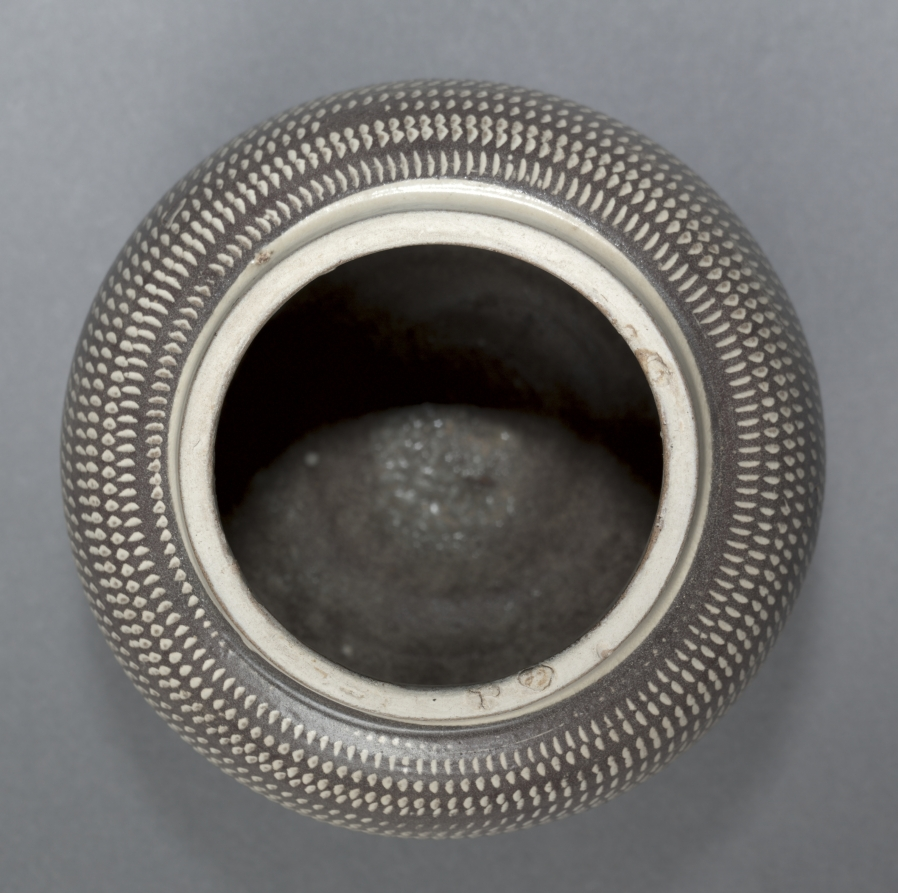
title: Jar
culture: Northern China, Northern Song (960-1127) or Jin dynasty (1115-1234)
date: 1100s-1200s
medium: glazed stoneware with roulette decoration, Cizhou ware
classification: Ceramic